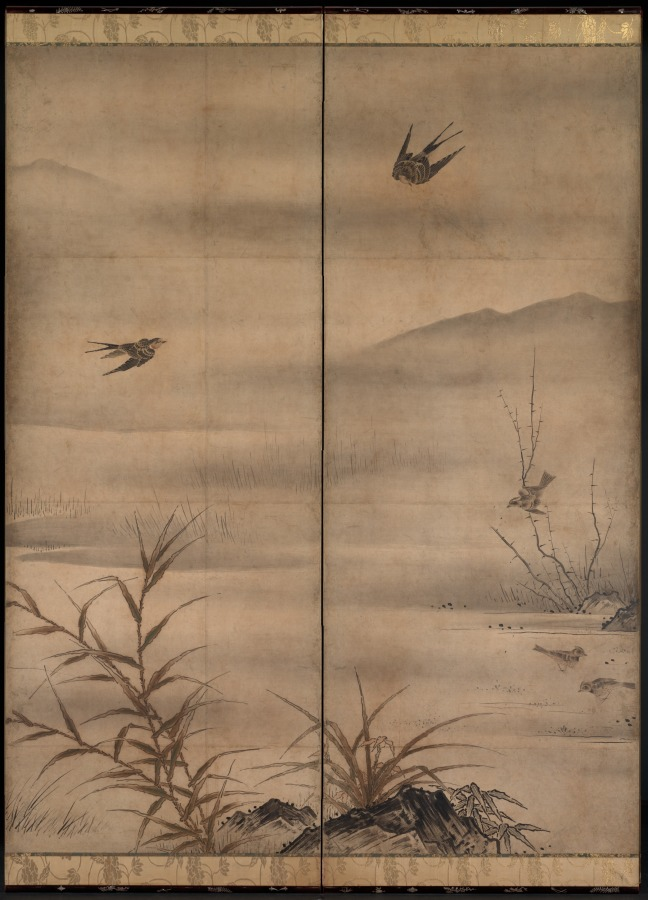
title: Birds and Flowers in a Landscape of the Four Seasons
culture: Japan, Muromachi period (1392–1573)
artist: follower of Sesshū Tōyō (Japanese, 1420–1506)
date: second half of the 1500s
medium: Six-panel folding screen, ink and color on paper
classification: Painting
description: The monk-painter Sesshū is revered today, as he was in his own time. While he left Kyoto's sophisticated intellectual and cultural environment to live in a provincial village in a far western province, he seems never to have severed contacts with the monastic communities of his young adulthood. His residence in Yamaguchi proved fortuitous because his patron, the region's military lord, enjoyed considerable freedom in conducting trade missions overseas with Korea and China. Sesshū went to China in 1467 and traveled about the country, visiting well-known historical sites and Chan (Zen) temples before returning two years later. Thus he became familiar with contemporary painting practices, materials, formats, and subject matter. His assimilation and then transmission of these elements had a profound impact on the following generations of ink painters, patrons, and Zen communities throughout Japan. Despite the presence on these byōbu of the name "Sesshū," they are from the hand of another accomplished but as yet anonymous follower active in the middle of the sixteenth century. Sesshū's name here, as on a handful of similar bird-and-flower byōbu, attests to the master's identification at that time with the colorful mural paintings on the same theme emanating from Ming dynasty China. This genre had heretofore been relegated to hanging scroll compositions, so the intro-duction into temple and daimyo residences of such an attractive theme surely caused considerable excitement in the later fifteenth century, when in all likelihood Sesshū introduced it into the Japanese painting repertoire. Subsequently, artists of varying backgrounds and training tried their hands at these large, dramatic scenes. From right to left the composition portrays an array of flowering plants in the near distance that indicate the passage of the seasons. Birds, usually paired, occupy this setting, engaged in various activities that lend naturalism and an air of peacefulness. The world they inhabit may be characterized pictorially by expansive middle-ground waterscapes that end where the far distant mountains rise as backdrops. These features appear consistently in other bird-and-flower byōbu attributed to Sesshū. Also noteworthy is the absence of any birds of prey such as the samurai's beloved hawks, emblems of fierceness and graceful strength that appear often in the byōbu of sixteenth-century Kano and Soga school painters.